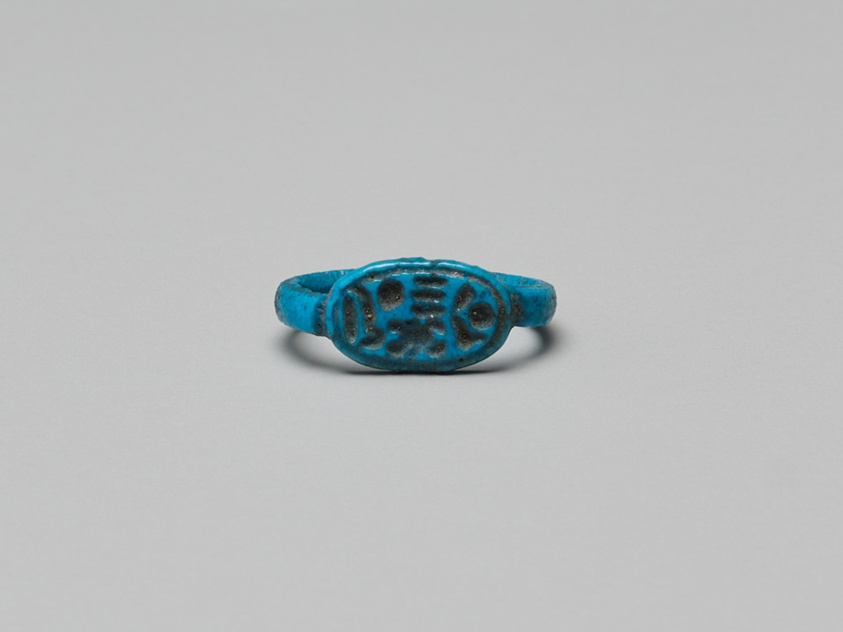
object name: Costume and Accessories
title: Finger Ring with the Throne Name of King Horemheb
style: new kingdom, eighteenth dynasty, ancient, egyptian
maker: Egyptian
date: New Kingdom, Dynasty 18, reign of Horemheb (about 1323–1295 BCE)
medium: Faience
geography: Egypt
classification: ring (jewelry); jewelry; ancient art; costume; faïence (composite material)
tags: Hieroglyphs, jewelry, king